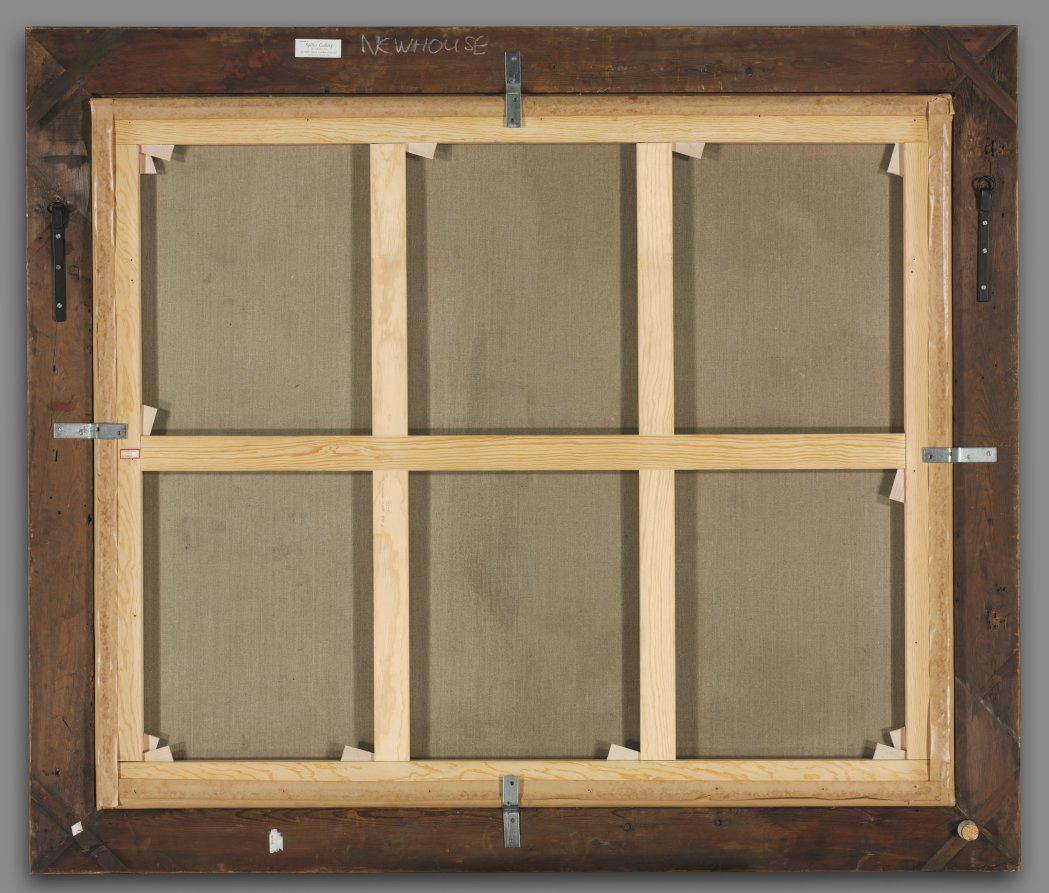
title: A Rooster and Turkey Fighting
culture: Netherlands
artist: Melchior de Hondecoeter (Dutch, 1636–1695)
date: c. 1680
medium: oil on canvas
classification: Painting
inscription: signed upper center: M C Hondecoeter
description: One of the most fashionable artists of his time, Hondecoeter specialized in paintings of domestic and exotic birds, and other animals. Here the composition is enlivened by the swirl and excitement of the fighting rooster and turkey, set in a garden with classical architecture. A large picture like this must have been placed high over a fireplace in a rich Amsterdam house.